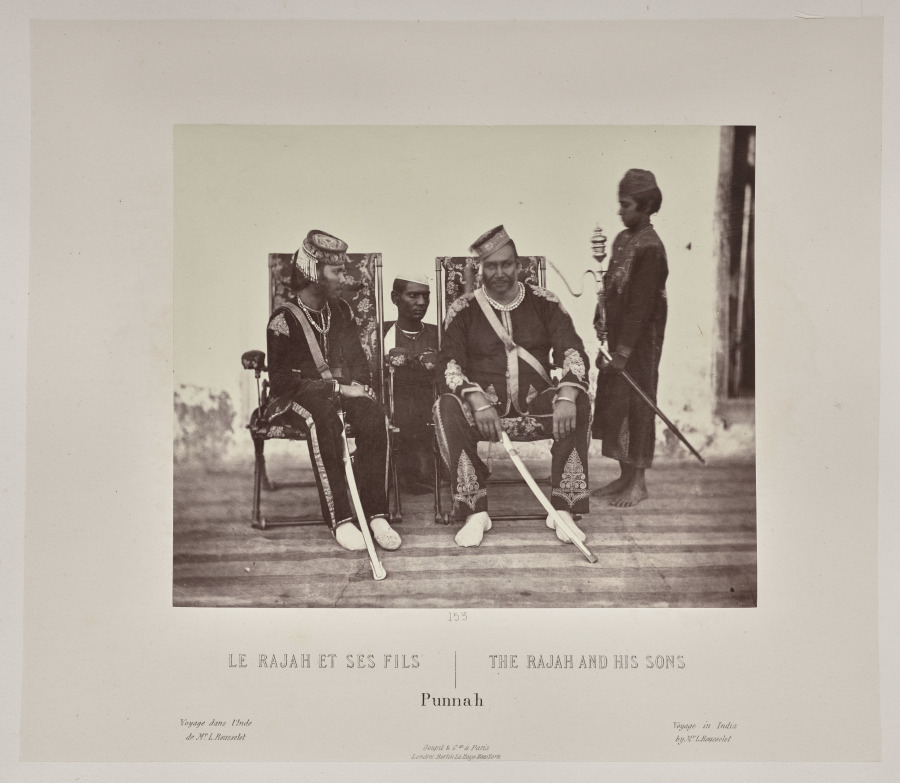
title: The Rajah and His Sons, Punnah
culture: France, 19th century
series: India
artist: Louis-Théophile Marie Rousselet (French, 1845–1929)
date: 1865–68, published 1869–70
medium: Albumen print from glass plate negative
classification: Photograph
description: Concerned that his drawings did not do justice to the splendor of India’s monuments, Rousselet learned photography in India that year, a remarkable accomplishment. He proved to be a talented photographer with a sophisticated sense of composition. The scenes in this volume sweep across sites of Sultanate, Rajput, and Mughal power in northern India, from the sacred Hindu city of Varanasi on the Ganges River to Alwar in Rajasthan. Also included are several scenes of industry and portraits of Indian rulers.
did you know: Louis Rousselet described himself as a “scientific traveler” when he went to India alone at age 18 in 1863 and stayed into 1868.